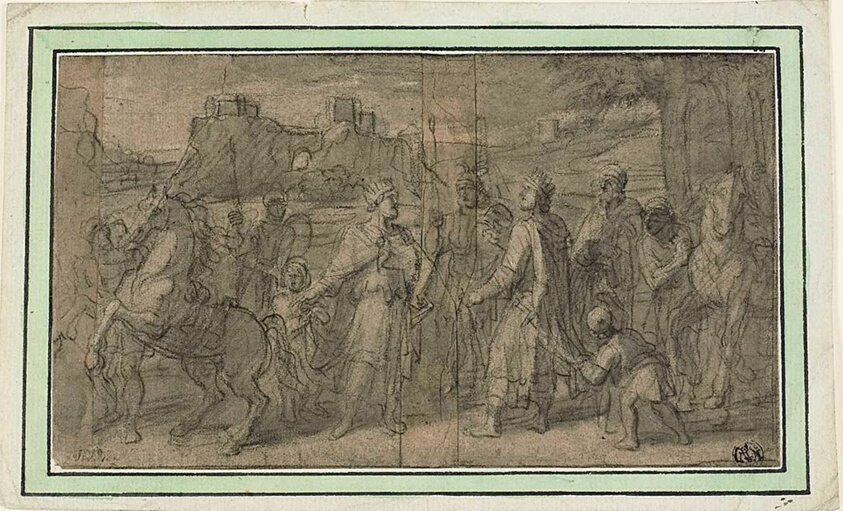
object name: Drawing and Watercolor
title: Meeting of Two Kings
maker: François Verdier (French, 1651-1730)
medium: Black chalk, brush and gray wash, on tan laid paper, pieced together and laid down on blue laid paper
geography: France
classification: chalk; drawings (visual works); prints and drawing